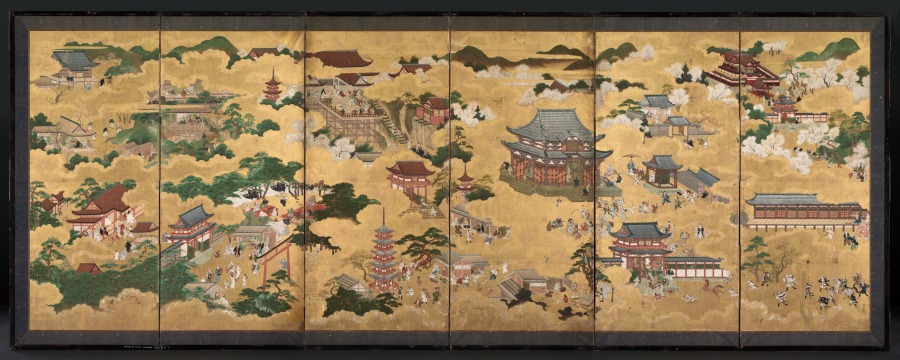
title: Views of Kyoto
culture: Japan, Edo period (1615–1868)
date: 1600s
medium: six-fold screen; ink and color on gold paper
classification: Painting